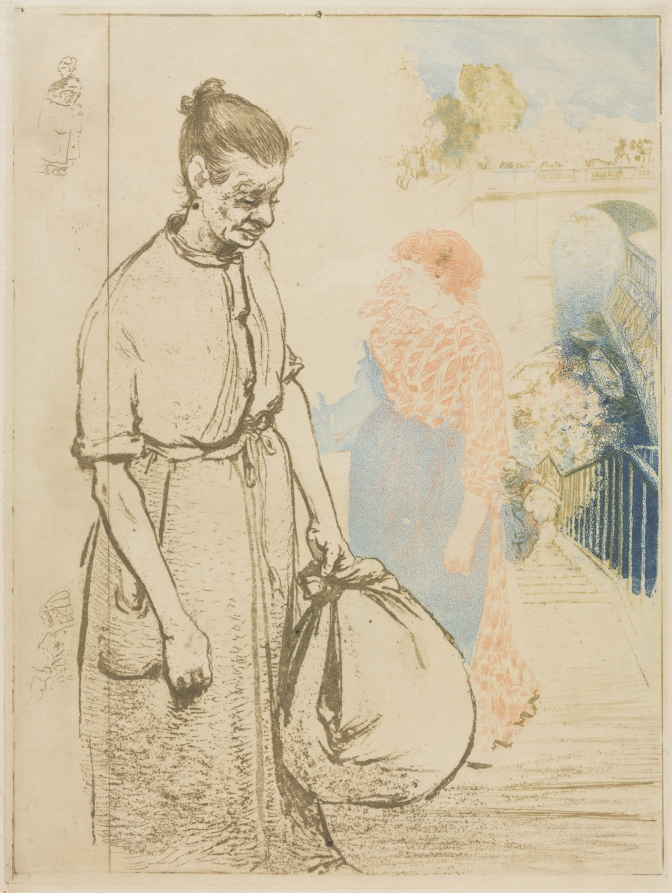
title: Washerwomen (Les Laveuses)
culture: France, 19th century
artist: Auguste Louis Lepère (French, 1849–1918)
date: 1894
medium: color etching and aquatint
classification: Print